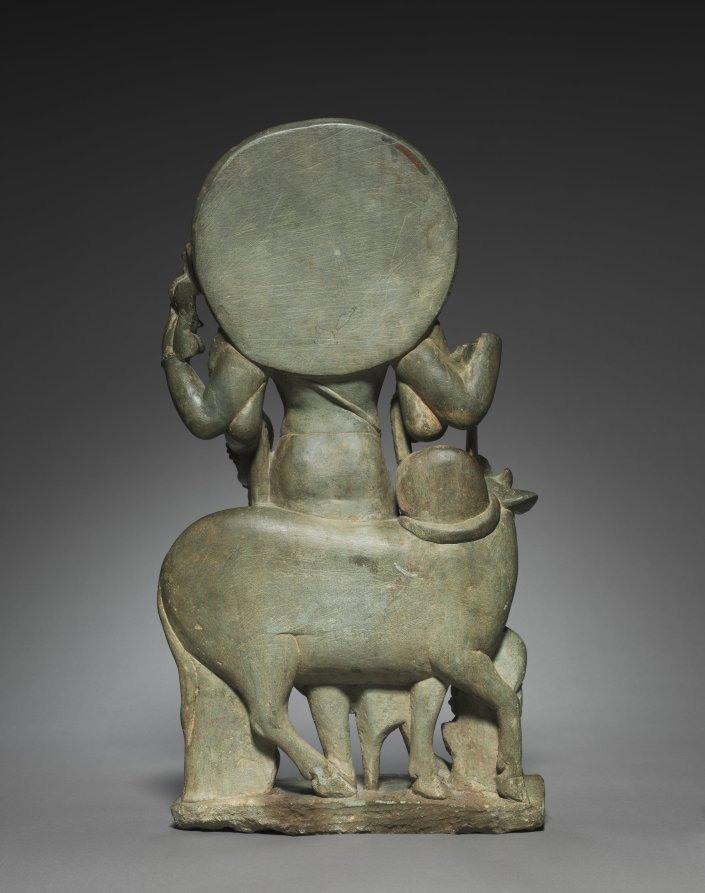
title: Standing Shiva Mahadeva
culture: Northern India, Kashmir, 8th century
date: 700s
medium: schist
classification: Sculpture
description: This early iconic form of Shiva as the Great God, or mahadeva, embodies his contradictory aspects. Shiva is both a yogi who lives outside of society and a king who rules the world. His yogic qualities can be seen in the matted locks of hair and the cobra that girds his torso, yet he wears a king’s crown. The forward-looking face of Shiva embodies his sovereignty. He grants freedom from fear with the gesture of his upraised right hand; his lowered left hand holds a citrus fruit, used in temple worship. His feminine aspect embodies features associated with creation and nurturing. She emanates as his wife Parvati, here seen as his left face. His right head is Bhairava, whose fearsome face embodies Shiva’s powers of destruction. His two sons, the elephant-headed Ganesha and the warrior Skanda, stand at his feet. Shiva’s vehicle, the bull Nandi, turns his head with a determination in all three of his eyes, which mirror the three eyes of Shiva.